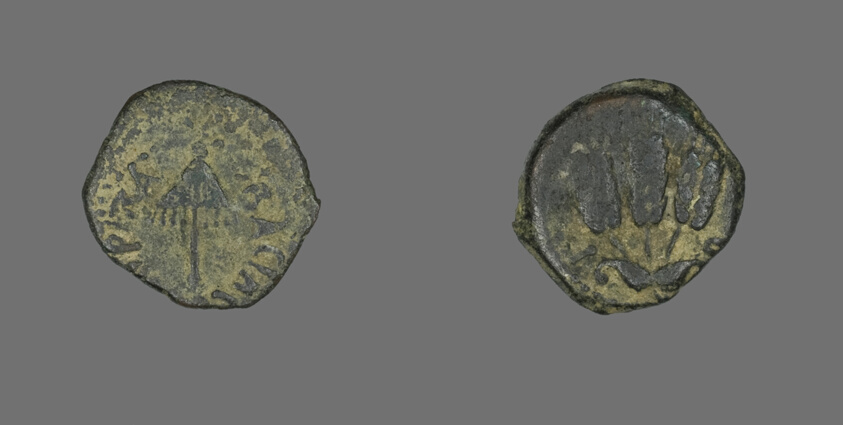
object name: Coin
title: Coin Depicting a Parasol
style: ancient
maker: Greek or Roman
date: 40-44, issued by King Agrippa of Judaea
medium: Bronze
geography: Roman Empire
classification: coin; ancient art